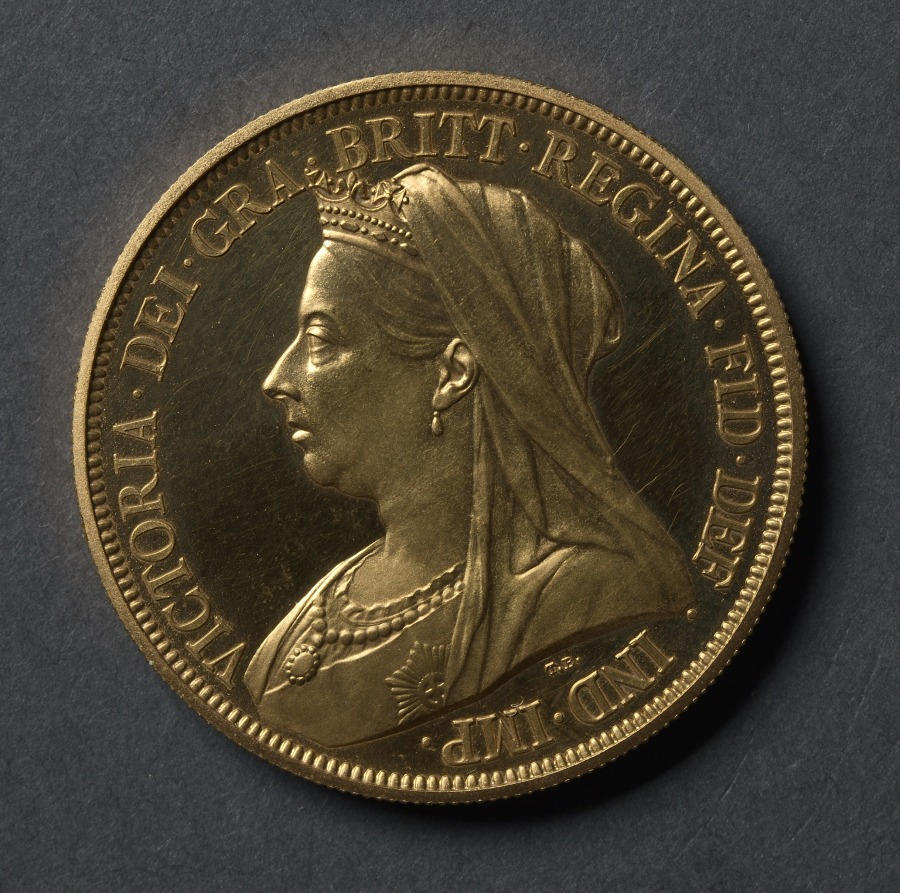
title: Five Pound Piece: Victoria (obverse); St. George and the Dragon (reverse)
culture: England, Victoria, 1837-1901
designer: after Benedetto Pistrucci (Italian, 1784–1855)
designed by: Thomas Brock (British, 1847–1922)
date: 1893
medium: gold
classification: Coins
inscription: VICTORIA . DEI . GRA . BRITT . REGINA . FID . DEF . IND . IMP .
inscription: 1893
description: After the minor storm of dislike which blew up over the 1887 Jubilee design, Thomas Brock, R.A., designed a new obverse, usually known as the "old head" type.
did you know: This coin was not for circulation and only appeared in proof sets.